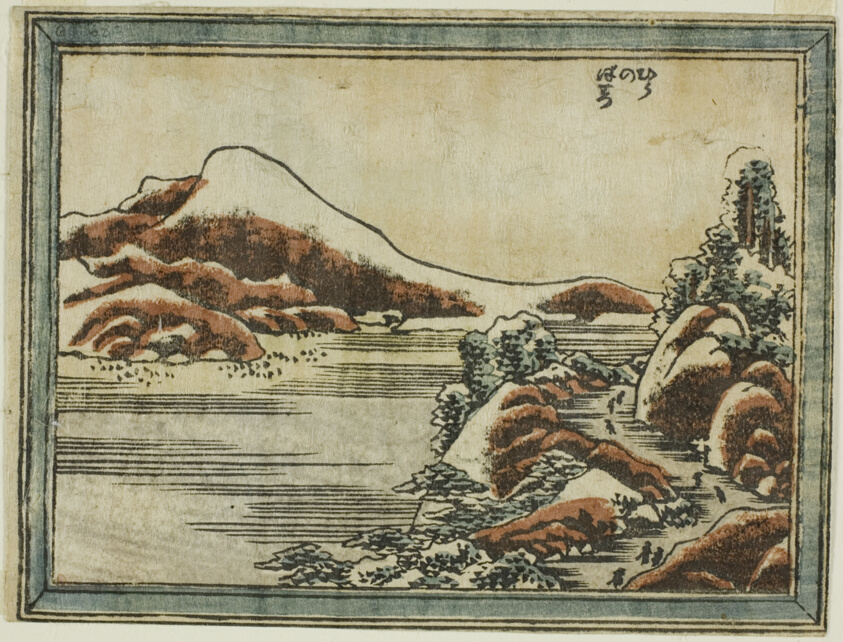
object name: Print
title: Snow at Dusk at Hira (Hira no bosetsu), from the series Eight Views of Omi in Etching Style (Doban Omi hakkei)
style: Japanese (culture or style)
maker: Katsushika Hokusai 葛飾 北斎; Japanese, 1760-1849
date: 1804/16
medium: Color woodblock print; horizontal koban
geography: Japan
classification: woodblock print; print; asian art